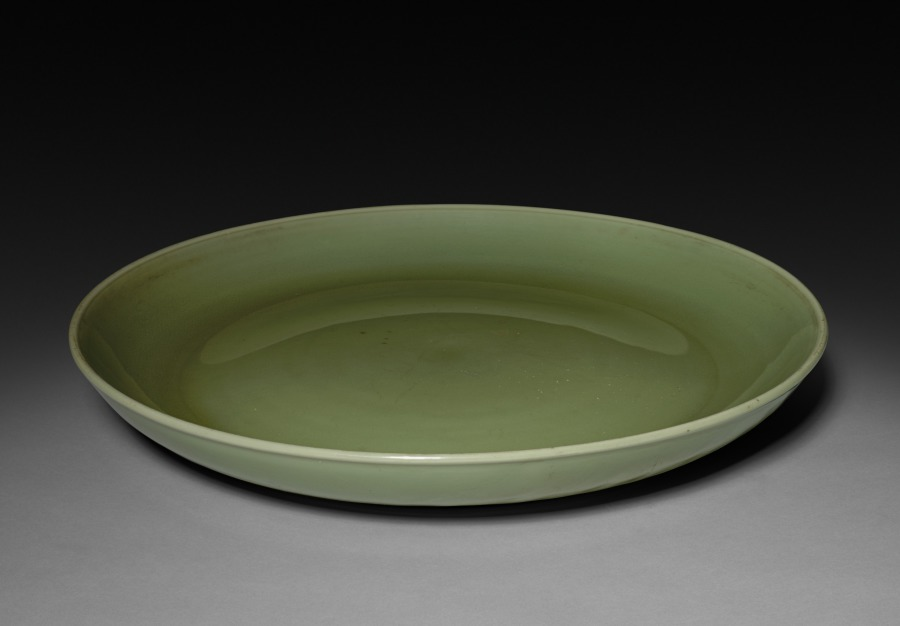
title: Platter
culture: China, Ming dynasty (1368–1644)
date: 1400s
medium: porcelain with celadon glaze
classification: Ceramic